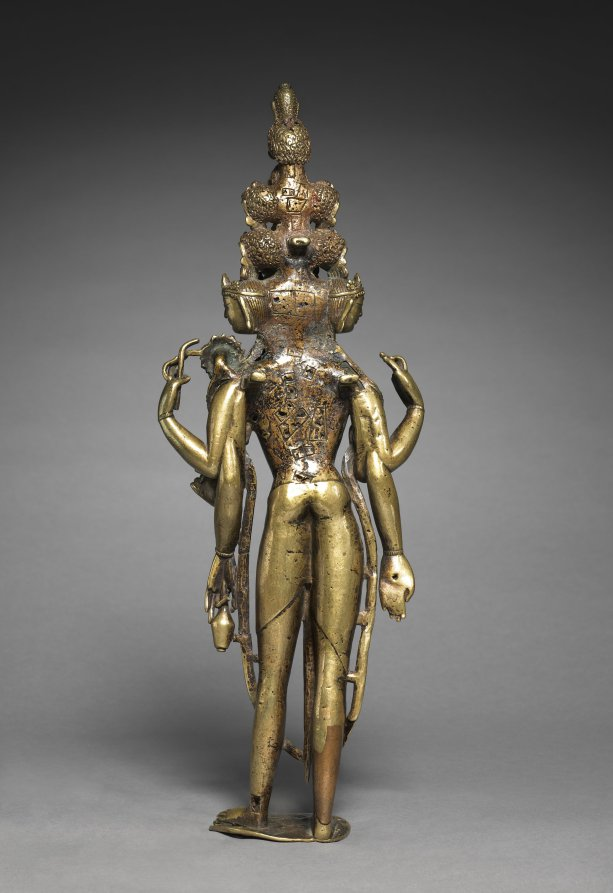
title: Eleven-Headed Bodhisattva of Compassion (Avalokiteshvara)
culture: Western Himalayas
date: around 1000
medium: gilt bronze with silver and copper inlay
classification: Sculpture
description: One of the finest surviving examples of its kind, this rare six-armed form of Avalokiteshvara has the slender athletic figure and penetrating expression associated with the art of Kashmir, the main source for western Tibetan styles. This Bodhisattva combines the qualities of a prince and an ascetic, with his crown and jewels combined with the yogi's antelope skin over his left shoulder and prayer beads in his middle right hand. Representing the range of Avalokiteshvara's forms and aspects, his eleven heads are remarkably articulated with individualized features. They follow textual descriptions that describe his three placid faces, three fierce faces, three terrifying howling faces, and one laughing face, all surmounted by a head of the Buddha Amitabha, with whom he is closely associated. Tongues and lips have been inlaid with copper to extraordinary effect, and a miniature seated figure of Amitabha Buddha has been placed in the center of every crown.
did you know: The bottle in his lower-left hand contains the nectar of immortality.